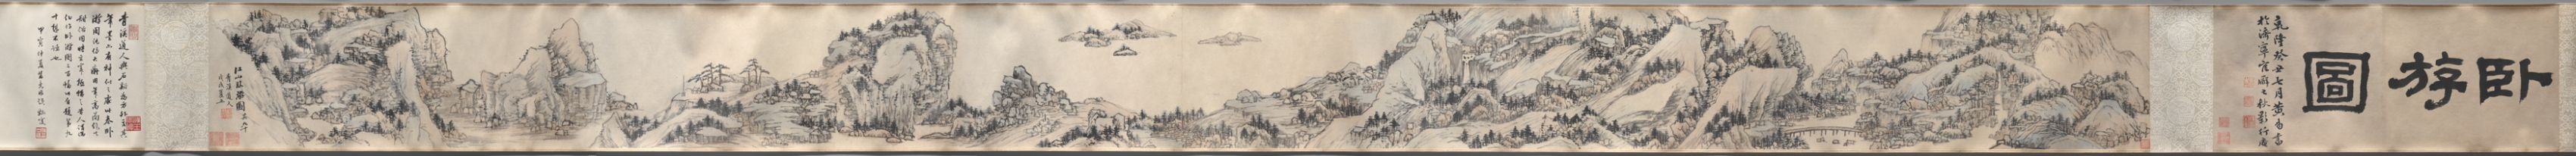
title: Dream Journey among Rivers and Mountains, no. 90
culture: China, Qing dynasty (1644-1911)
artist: Cheng Zhengkui (Chinese, 1604–1676)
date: 1658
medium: Handscroll; ink and color on paper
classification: Painting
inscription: 江山臥遊圖其九十, 青溪道人, 戊戌夏五。 [印] 程正揆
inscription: Title and inscription by Huang Yi 黃易 (1744–1802), and 3 seals.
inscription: 1 colophon and 9 additional seals: 3 seals of Dai Zhi 戴植 (active about 1821–1850); 1 colophon, dated 1914, and 3 seals of Yan Shiqing 顏世清 (1873–1929); 3 seals of Wang Nanping 王南屏 (1924–1985).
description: Cliffs and waterfalls interspersed with trees and dotted vegetation are spread over this handscroll. Long paths wind their way through villages, beside cottages, shrines, and over bridges. In the past, Chinese literati officials liked to take a “dream journey” along mountains and rivers when viewing landscape paintings in their studios. Scenery of this kind thus became a way to escape from the world of bureaucracy and administration. The painter Cheng Zhengkui used the title “Dream Journey” for a whole series of paintings, of which this is number 90. He is said to have painted 500 of them, but the actual count remains unknown.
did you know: Cheng Zhengkui planned to make 100 dream journey paintings but may have ultimately made 500.